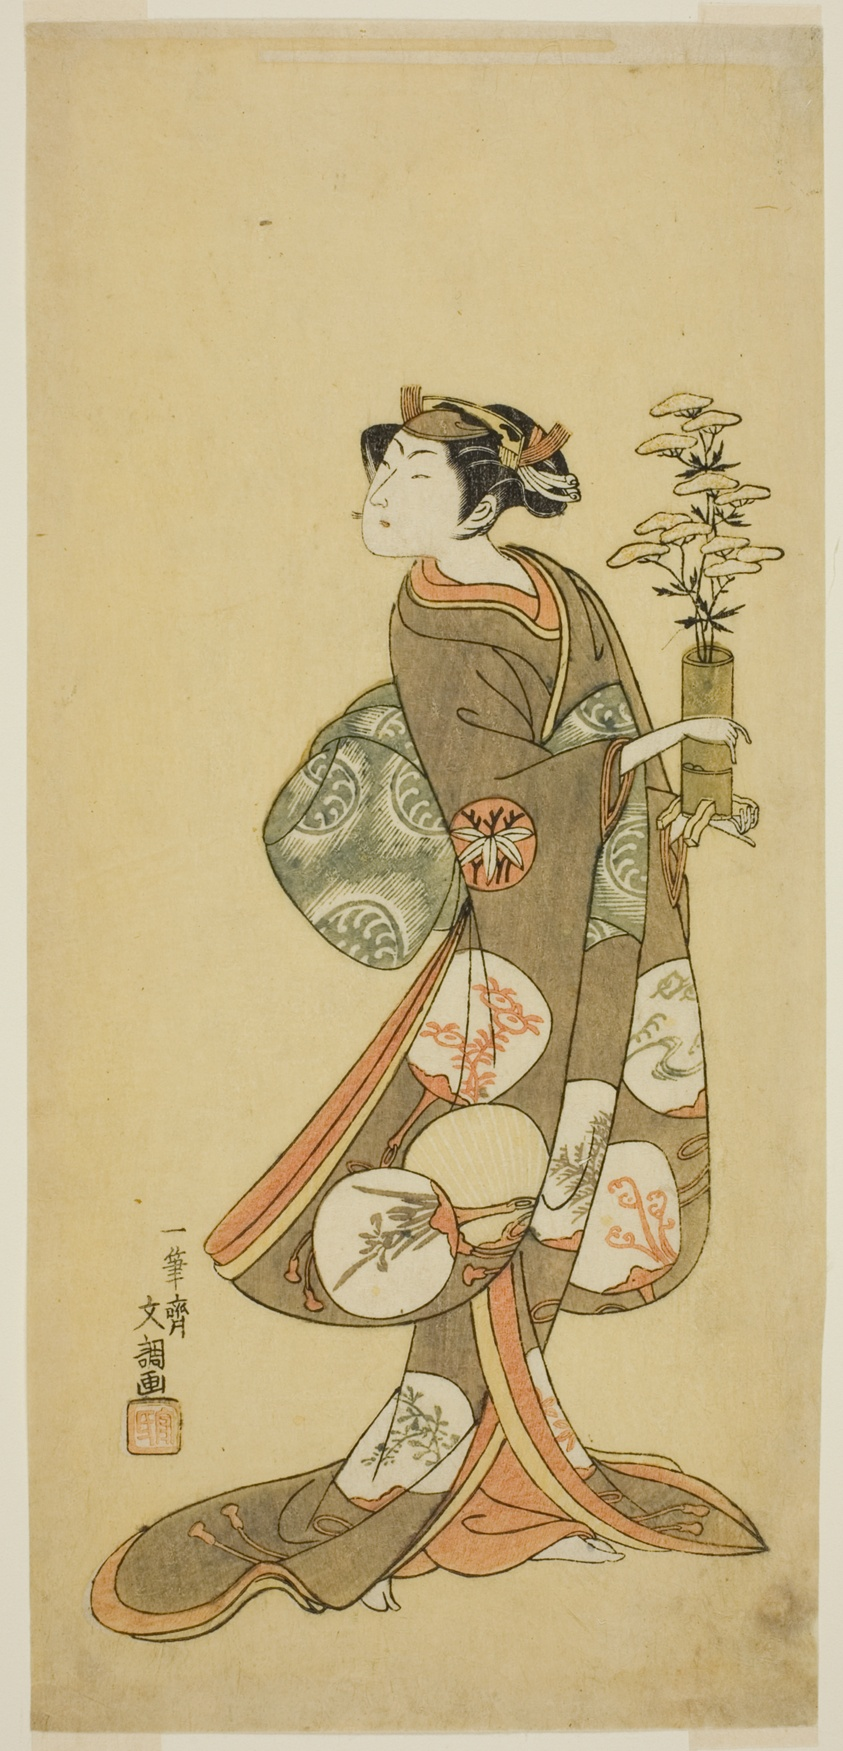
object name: Print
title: The Actor Yamashita Kyonosuke I in a Female Role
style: Japanese (culture or style)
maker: Ippitsusai Buncho (Japanese, active c. 1755-90)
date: c. 1769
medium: Color woodblock print; hosoban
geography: Japan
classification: woodblock print; print; asian art